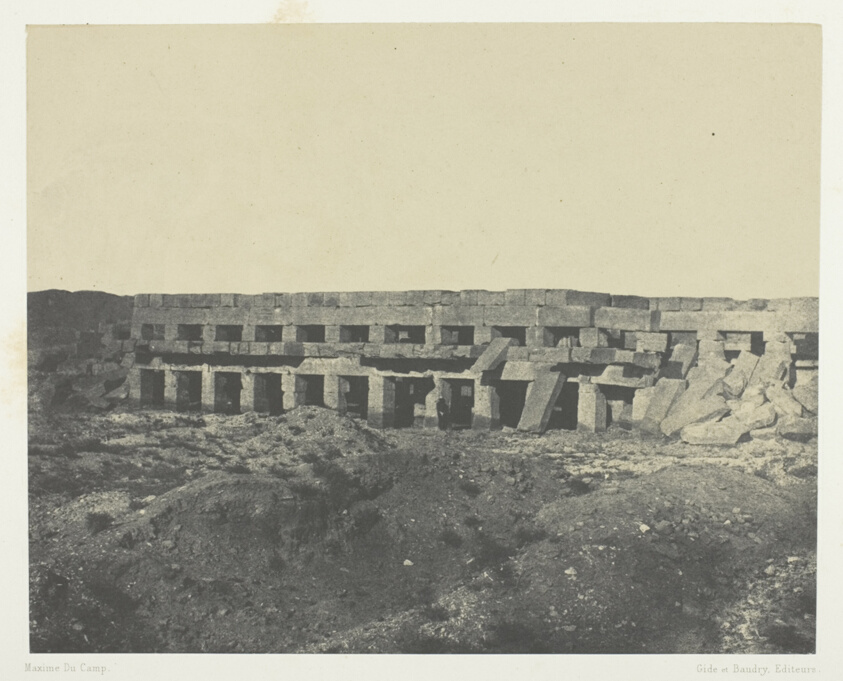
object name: Photograph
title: Palais de Karnak, Appartements Privés du Palais, Promenoir de Tôthmès III; Thèbes, plate 45 from the album "Egypte, Nubie, Palestine et Syrie" (1852)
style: 19th century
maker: Maxime Du Camp (French, 1822–1894)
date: 1849/51, printed 1852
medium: Salted paper print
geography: France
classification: salted paper print; photographic process; photography; photograph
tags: Collected by Hugh Edwards, Egypte, Nubie, Palestine et Syrie